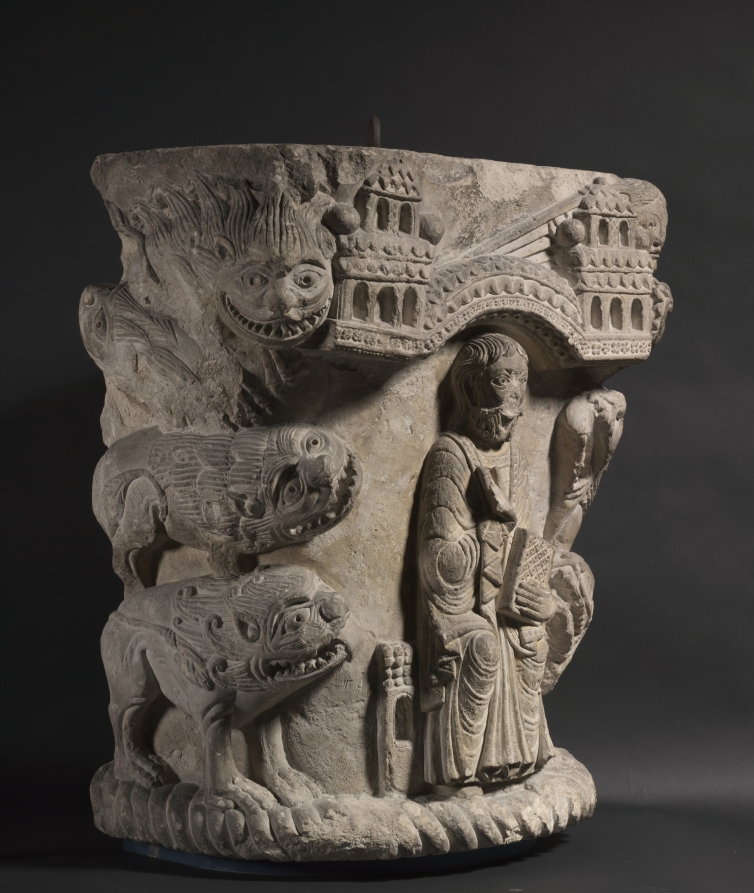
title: Daniel in the Lion's Den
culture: France, Saint-Aignan-sur-Cher, 12th century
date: c. 1125–50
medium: limestone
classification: Sculpture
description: According to the Old Testament, Daniel was cast into a lion’s den as punishment for his belief in a single god, but he was miraculously delivered from harm on account of his faith. This story is related here, with Daniel flanked by lions and the angel sent by God to save him. Together with other decorated capitals, this imposing work of Romanesque sculpture once decorated the interior of the church of Saint-Aignan-sur-Cher, a city in central France.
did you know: During the 12th century, churches used images to teach the faithful who were illiterate. While Daniel lived before Jesus, he is depicted holding a bible, alluding to the continuity between the Old and New Testaments.